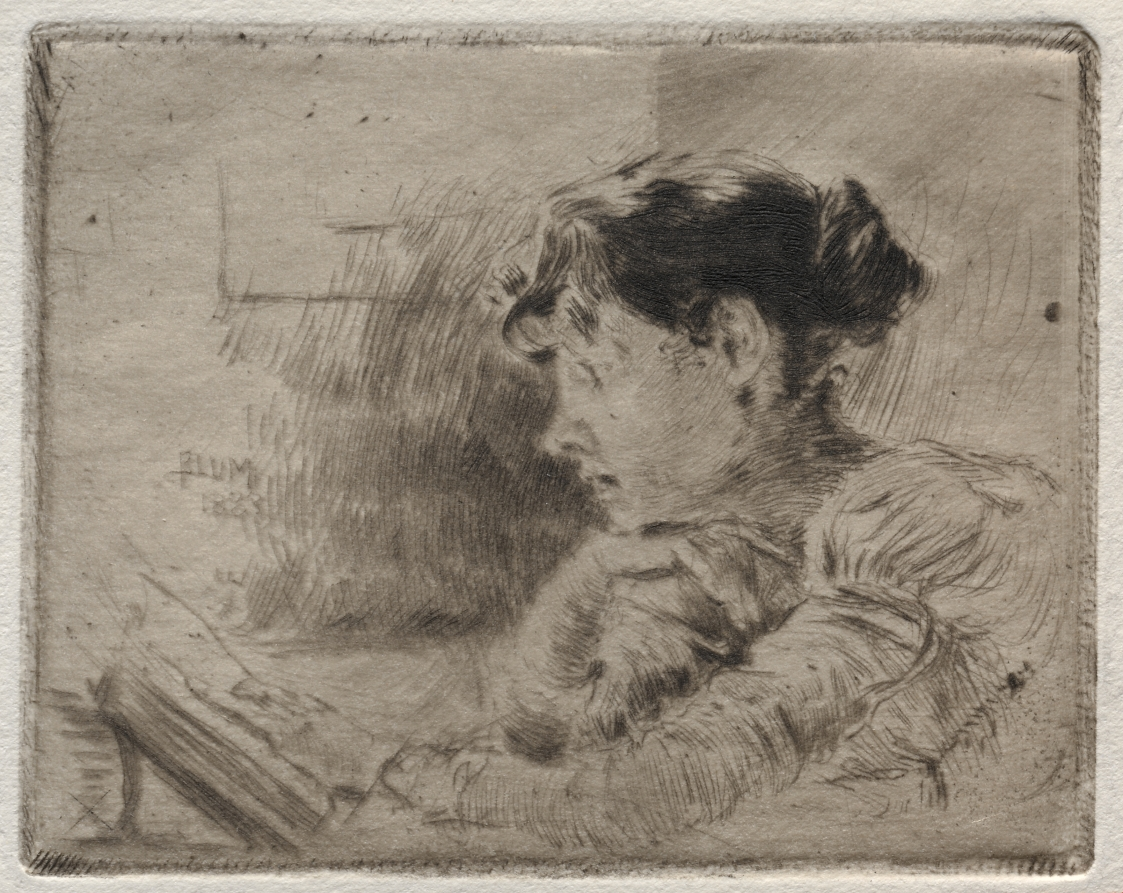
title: Girl Reading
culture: America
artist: Robert Frederick Blum (American, 1857–1903)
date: 1883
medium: etching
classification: Print